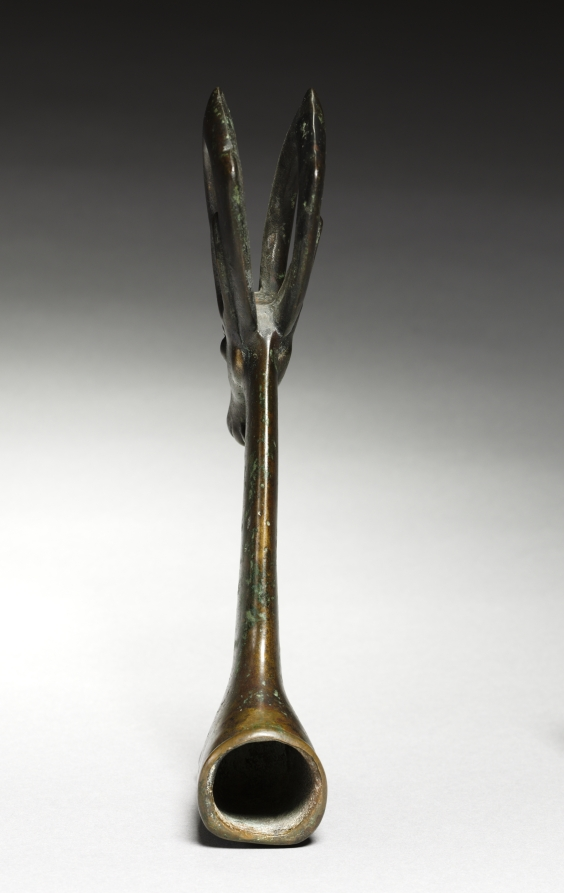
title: Ibex Whetstone Handle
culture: Iran, Luristan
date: 1100–900 BCE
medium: bronze, cast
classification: Sculpture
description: For millennia, whetstones have been used for sharpening various kinds of metal blades. They were particularly important in Luristan, a center that produced bronze blades.